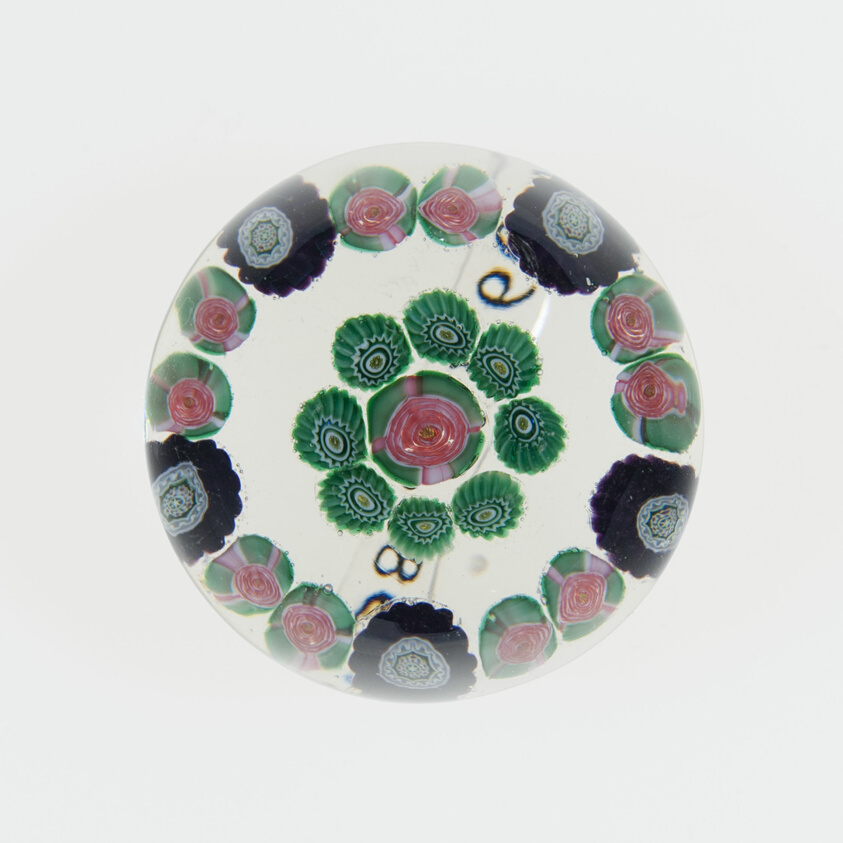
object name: Glass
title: Paperweight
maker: Clichy Glassworks (Cristalleries de Clichy); Clichy, France, 1837-1885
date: c. 1845/60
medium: Glass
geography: France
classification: paperweight; glass